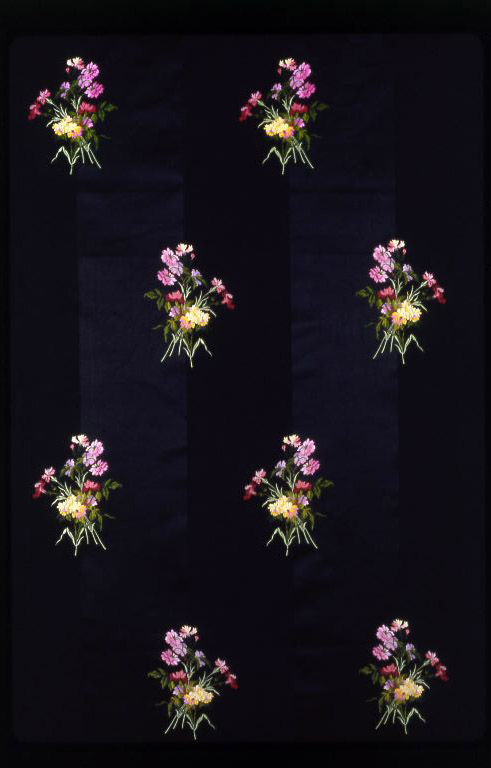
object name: Textile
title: Three Fragments from Dress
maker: France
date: c. 1885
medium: Black silk with alternating stripes of stain and gros grain; brocaded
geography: France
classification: textile; weaving